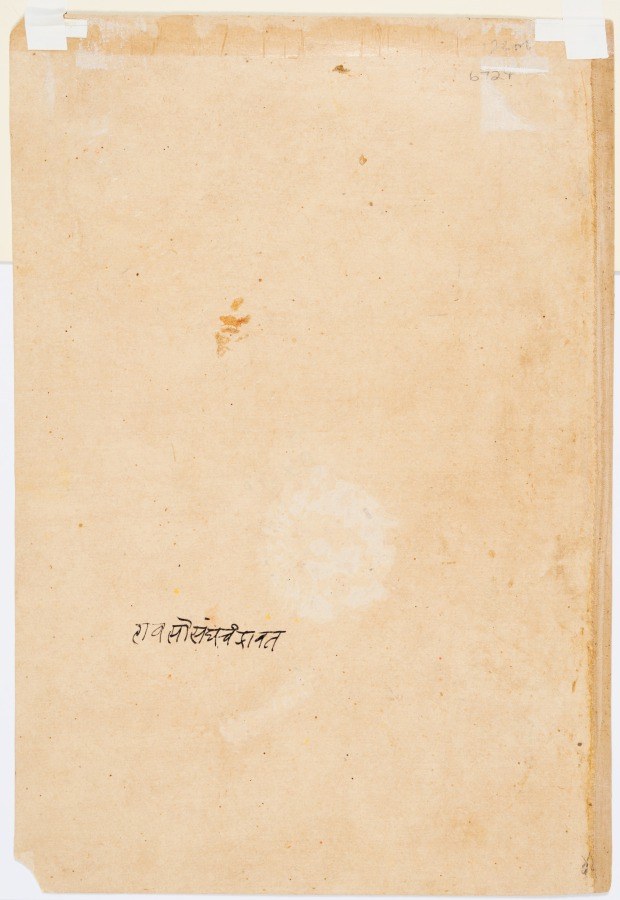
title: Portrait of Rao Shiv Singh Chandrawat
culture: Northwestern India, Rajasthan, Marwar, Rajput Kingdom of Jodhpur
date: c. 1720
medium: Gum tempera and gold on paper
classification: Painting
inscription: rāva so saṃgha caṃdrāvata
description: The bust portrait of a Rajput ruler shows him wearing a blue turban with floral pattern and white garment. A costly pearl and ruby earring suggests his financial affluence. The artist has exhibited his skill in the sensitive rendering of the figure’s eyebrow and mustache.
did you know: Rao Shiv Singh’s granddaughter was married to Maharaja Pratap Singh of Jaipur (CMA 2011.207).